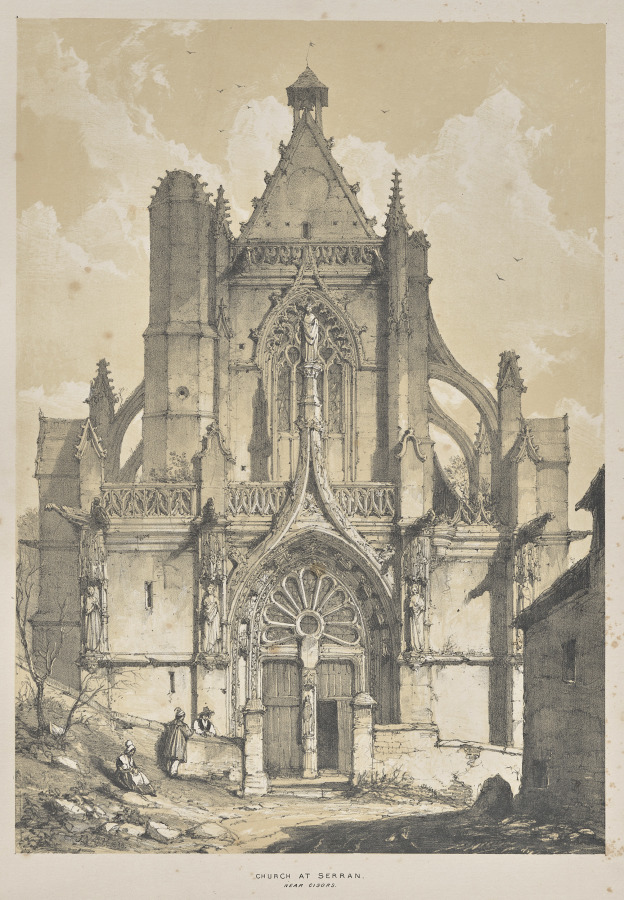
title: Architecture of the Middle Ages: Church at Serran, near Gisore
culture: England, 19th century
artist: Joseph Nash (British, 1808–1878)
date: 1838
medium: lithograph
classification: Print